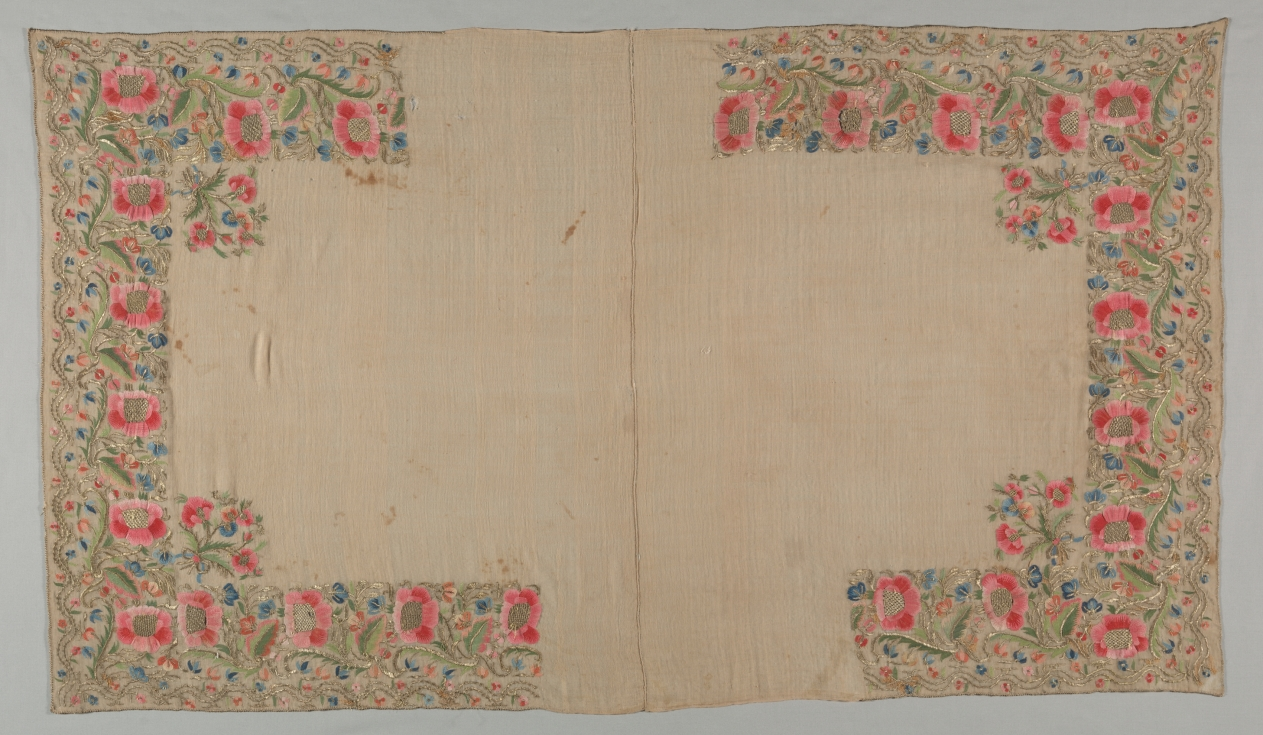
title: Embroidered Towel (Havlu)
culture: Turkey, 19th century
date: 19th century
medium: embroidery: silk and metallic threads on cotton tabby ground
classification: Embroidery